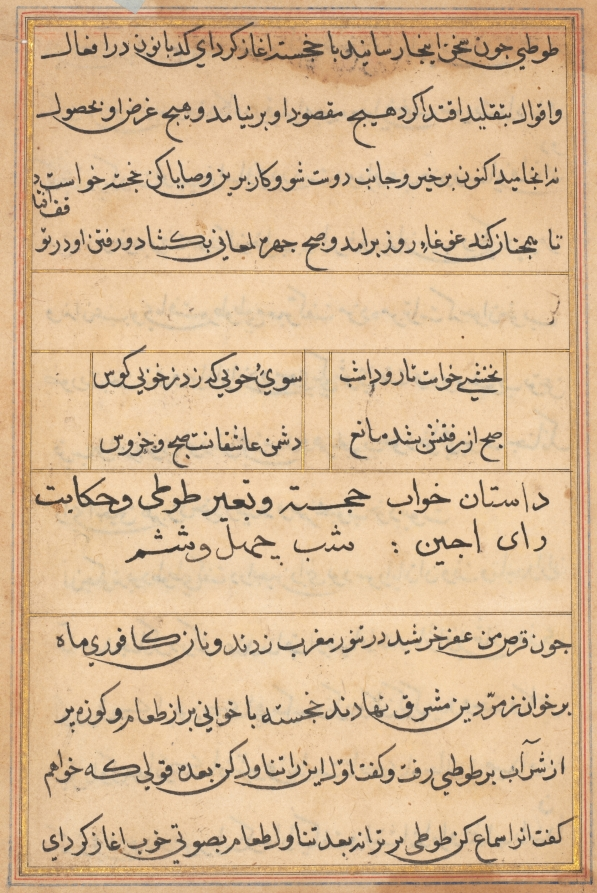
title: Page from Tales of a Parrot (Tuti-nama): text page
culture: Mughal India, court of Akbar (reigned 1556–1605)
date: c. 1560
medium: gum tempera, ink, and gold on paper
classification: Painting